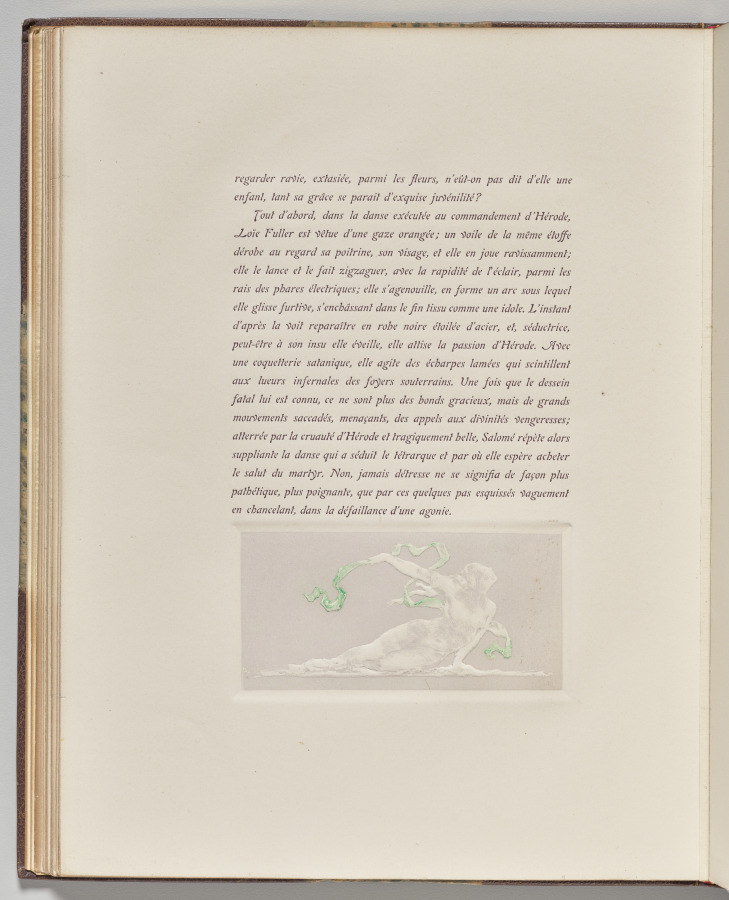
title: Dancing Woman in Reclining Pose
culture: France, early 20th Century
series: La Loïe Fuller, by Roger Marx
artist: Pierre Roche (French, 1855–1922)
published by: Les Cents Bibliophiles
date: 1904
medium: gypsograph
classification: Bound Volume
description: Although best known as a sculptor, Roche was a versatile and prolific artist who worked in many mediums. Loïe Fuller, the pioneer of modern dance who took Paris by storm in 1892, was one of his favorite subjects. He portrayed her in clay, bronze, marble, plaster, and in a series of gypsographs that illustrated an essay by the art critic Roger Marx. The book was described as "a precious monument to Loïe Fuller."